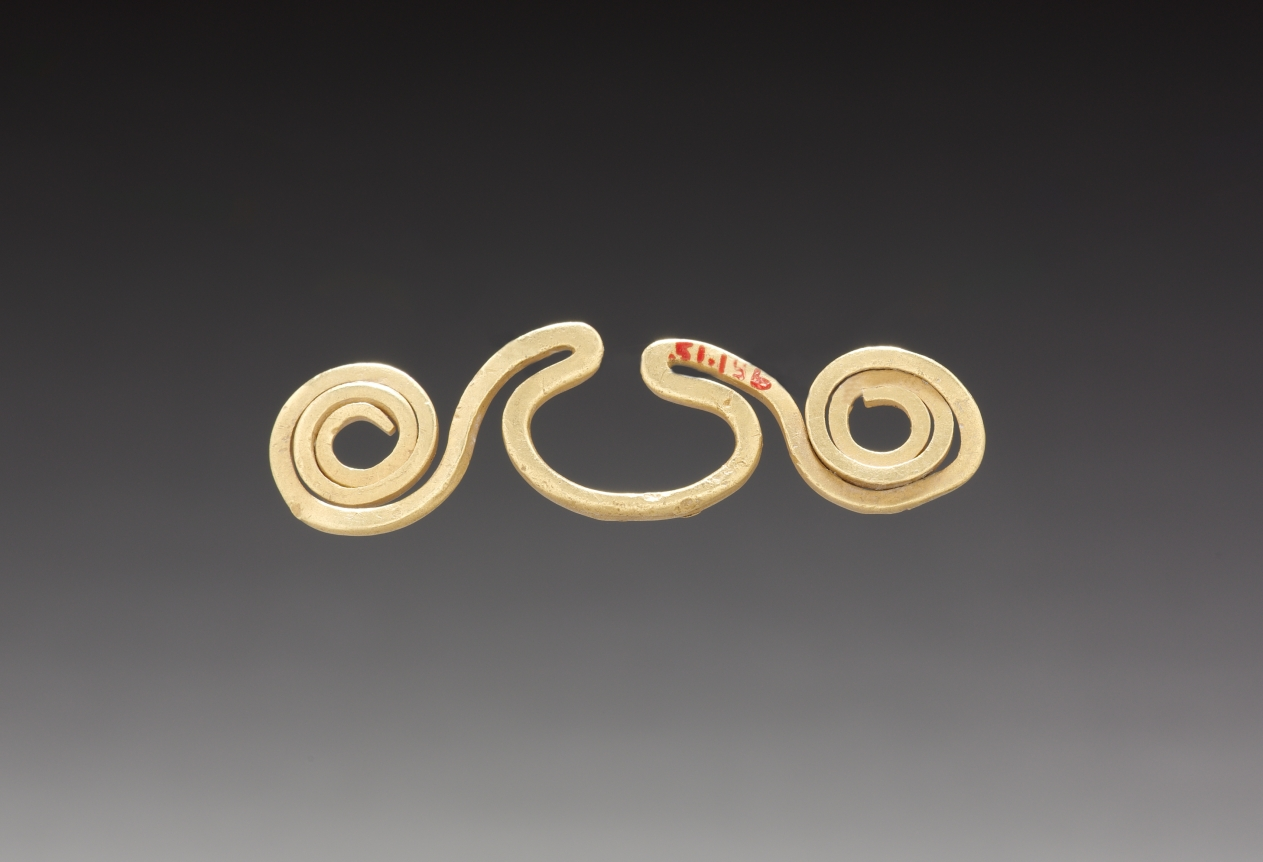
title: Nose Plug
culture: Ecuador, Esmeraldas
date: 200–1000 CE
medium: gold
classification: Metalwork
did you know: Working with gold dates back to at least 500 BC in Ecuador and Colombia.